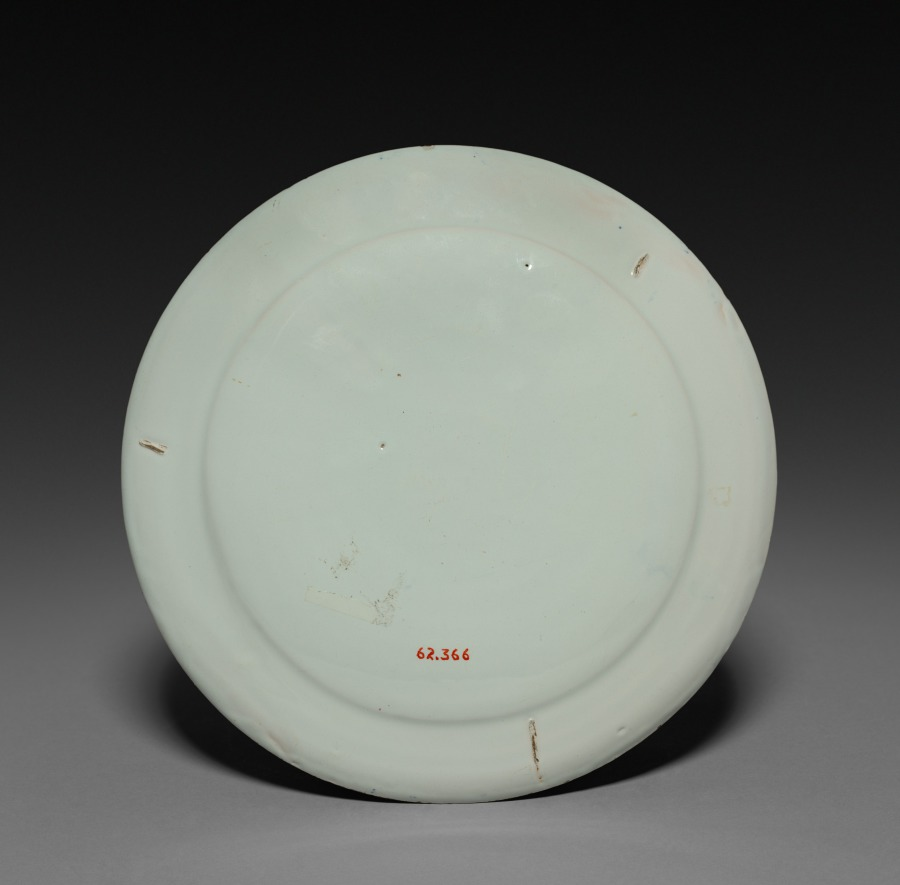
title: Plate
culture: France, Moustiers(?), late 18th century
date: late 1700s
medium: faience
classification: Ceramic